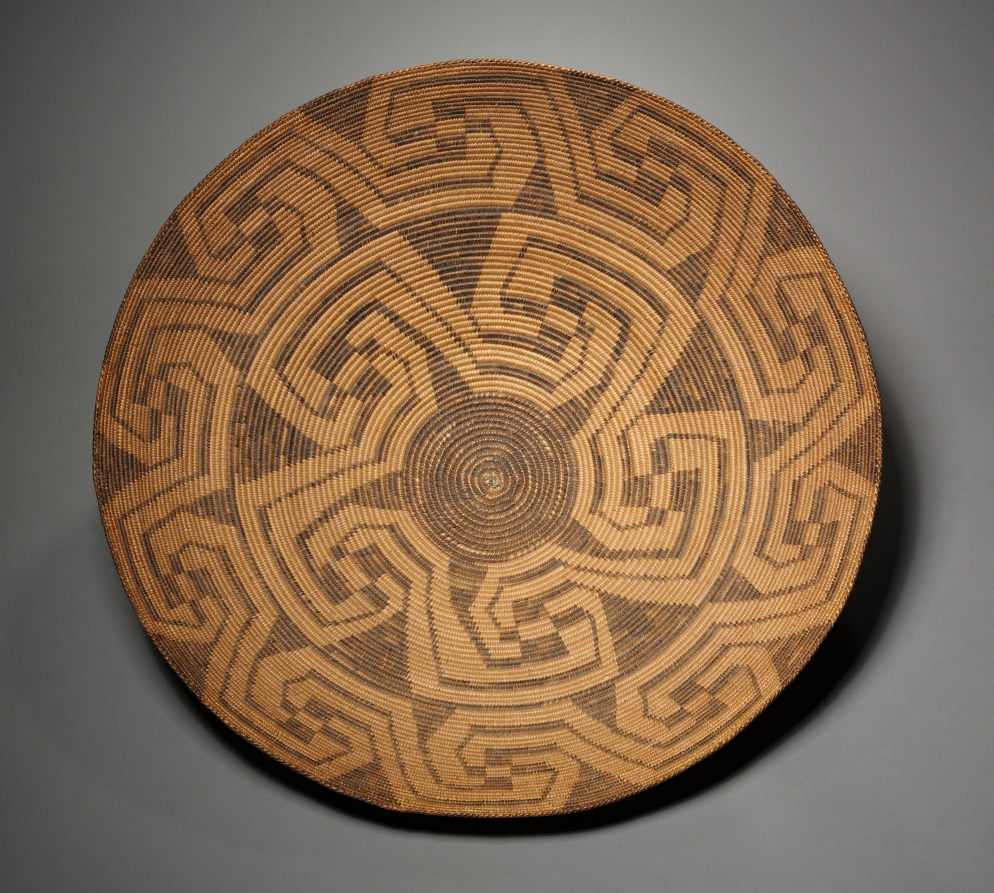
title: Tray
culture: Akimel O'odham (Pima), 20th century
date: before 1929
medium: coiled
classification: Basketry